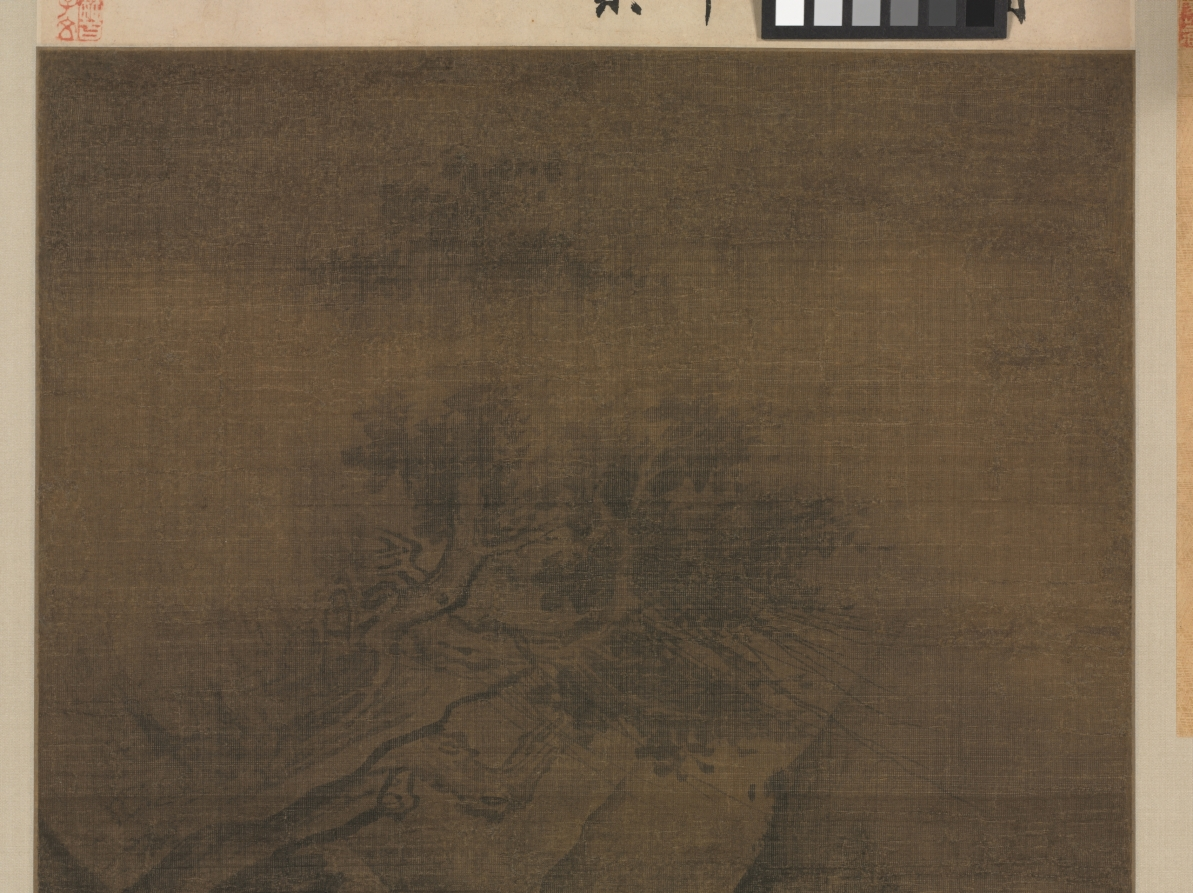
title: Waterfall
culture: China, Song dynasty (960-1279) - Yuan dynasty (1271-1368)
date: 1271–1368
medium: hanging scroll, ink and slight color on silk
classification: Painting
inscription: Label on the mounting with 2 seals of T'ang ? of Pi-ling (16th c.); label on back of mounting of Kü Kuang-hsü (1731-1797). 1 colophon and 8 additional seals: 1 colophon, dated 1625, and 2 seals of Kao P'an-lung (1562-1626); 2 seals of Liu Shu (1759-1816); 1 seal of Pi Lung (late 18th c.); 1 seal of Ts'ao tzu-wen; 2 seals unidentified. WKH